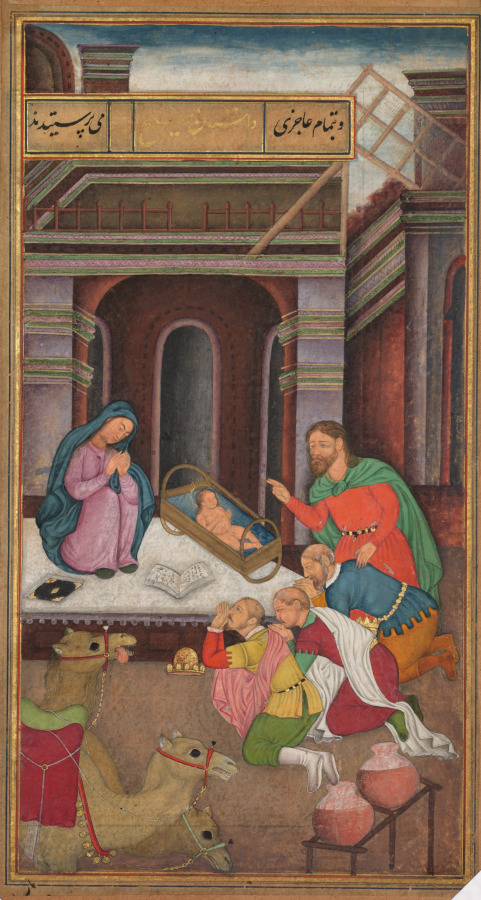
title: The Adoration of the Magi, from a Mirror of Holiness (Mir’at al-quds) of Father Jerome Xavier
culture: Northern India, Uttar Pradesh, Allahabad, Mughal period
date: 1602–4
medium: Gum tempera, ink, and gold on paper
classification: Manuscript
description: In this Nativity scene, familiar in Christian contexts, Mary and Joseph present the infant Jesus to the three Magi, who have placed their crowns on the ground in homage to the King of Kings. The three Magi are portrayed in Portuguese costumes to indicate to a Mughal audience that they are foreigners who believed in Christ. The artist cleverly and humorously indicates that the Magi have just arrived in Bethlehem by depicting their three camels in the bottom corner. One exhausted camel’s tongue hangs out the side of his mouth, while the other two animals lean eagerly toward a pair of water jugs.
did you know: The books next to newborn Jesus indicate that his birth fulfills a prophecy.